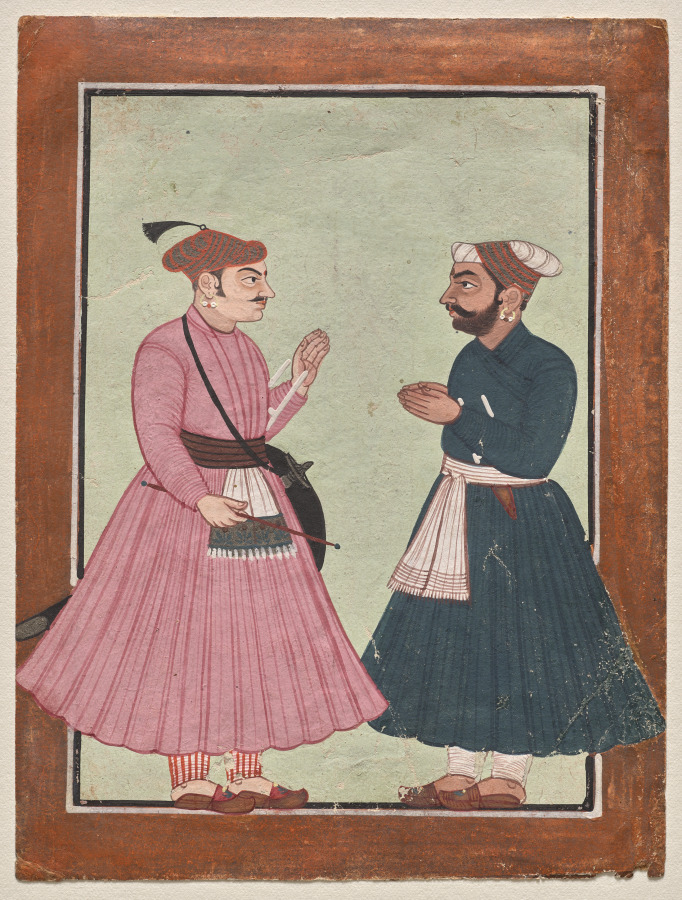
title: A Mandi royal family member receives a noble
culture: Northern India, Pahari kingdoms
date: c. 1700–1720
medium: Gum tempera and silver on paper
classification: Painting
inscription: 18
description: Two nobles dressed in royal apparel greet each other. The man in a pine green jama folds his hands in supplication to the one clad in a mauve robe. The man on the left is probably a raja, as he adorns his turban with a royal plume and raises his hand to bless the other.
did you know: The man in mauve robe wears a Mughal sash bearing embroidered flowering plants.